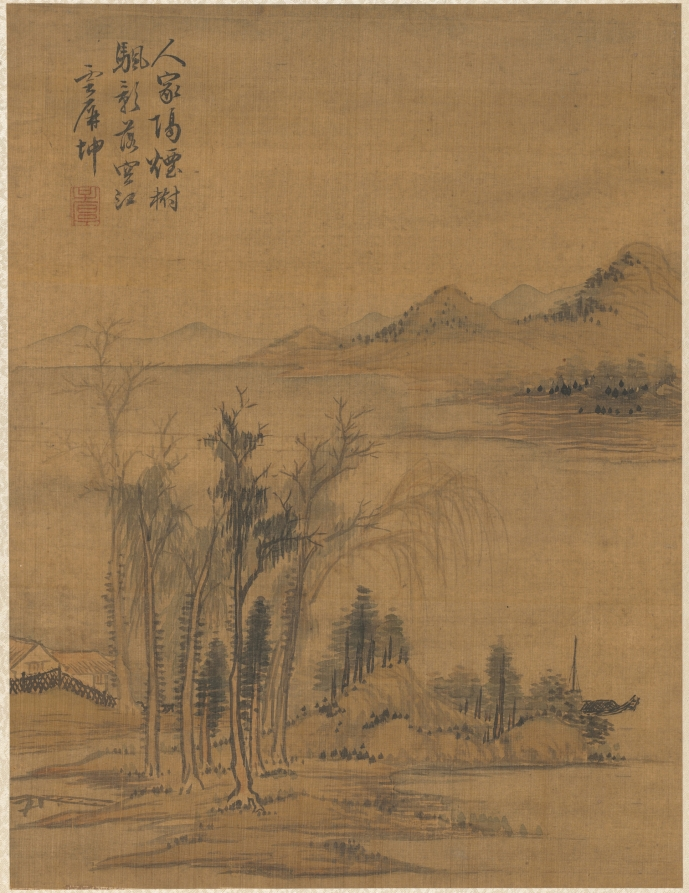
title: Landscape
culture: China, Qing dynasty (1644-1911)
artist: Zhai Dakun (Chinese, d. 1804)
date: 1775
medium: album leaf; ink and color on silk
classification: Painting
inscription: Spit of Misty Trees. A human dwelling on a spit of misty trees, Shimmering reflections fall on the empty river. Yunping Kun. Seal: r/r "Zihou"